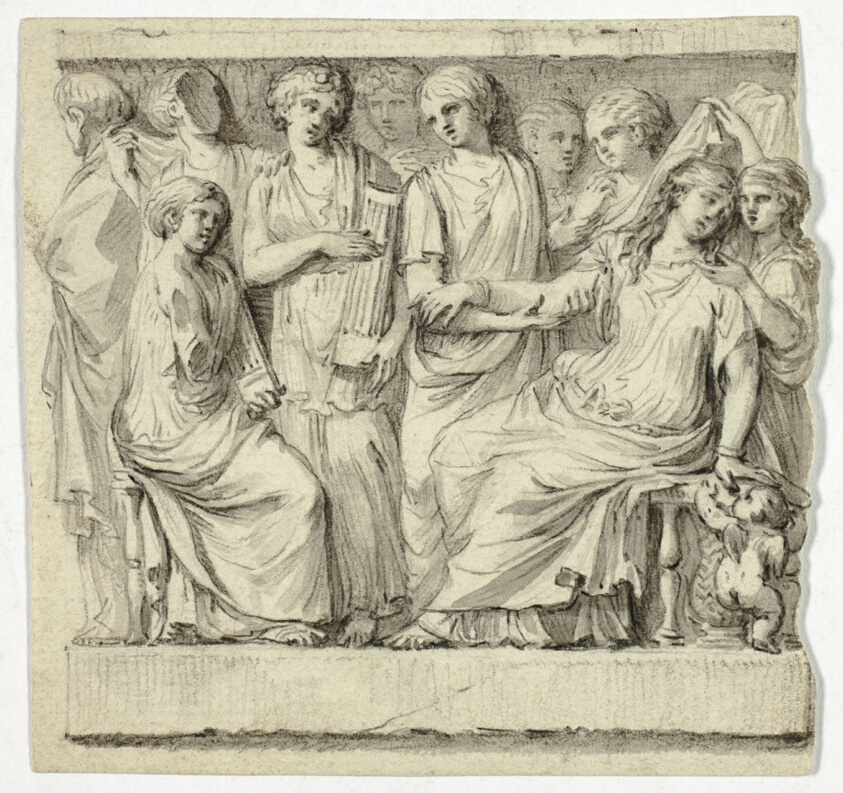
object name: Drawing and Watercolor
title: Copy after Sarcophagus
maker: Unknown Artist; French, 1701-1800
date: 1701-1800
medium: Drawing on paper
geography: France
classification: drawings (visual works); prints and drawing